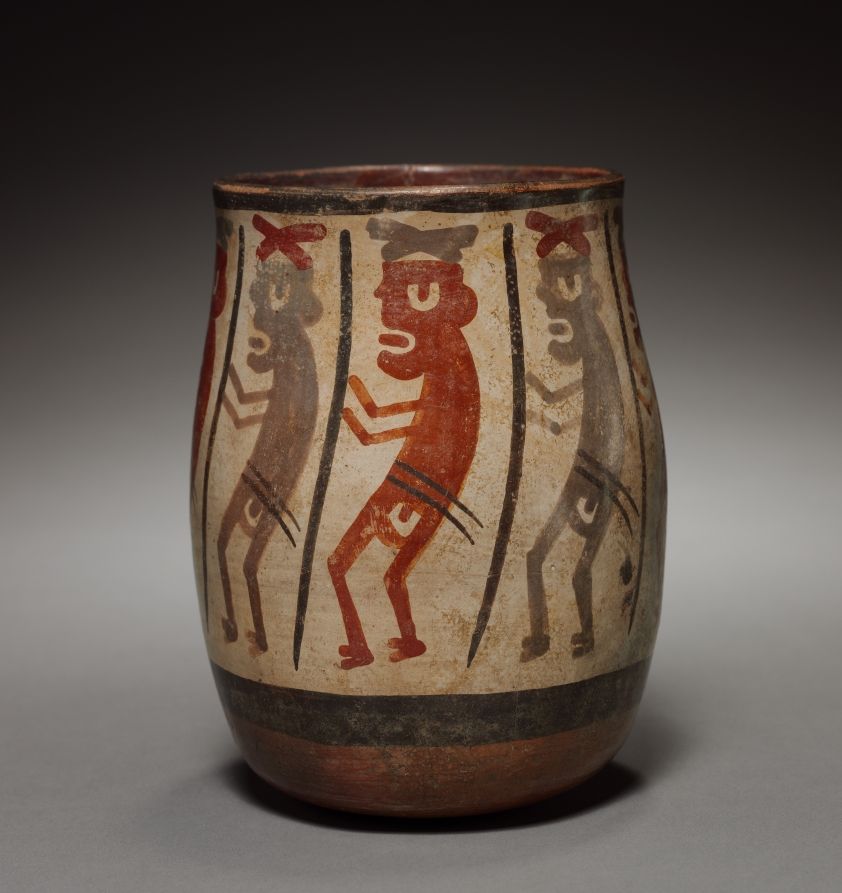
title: Vase with Procession of Warriors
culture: Peru, South Coast, Nasca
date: c. 350–600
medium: earthenware with colored slips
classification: Ceramic